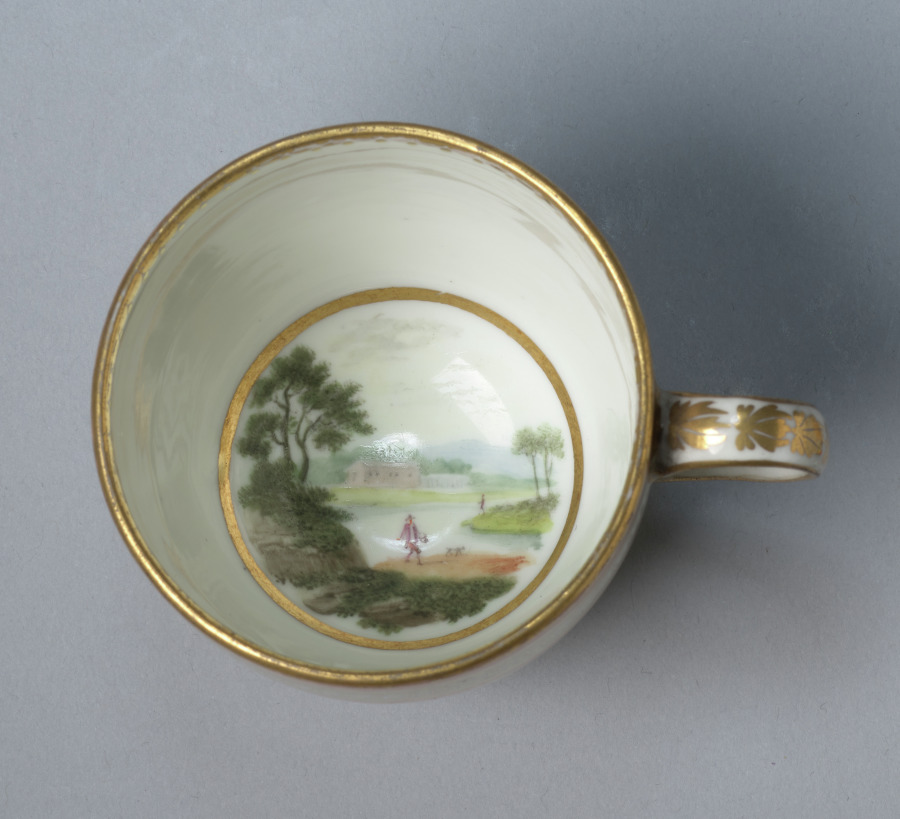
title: Cup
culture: England, Derby, early 19th century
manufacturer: Derby (Crown Derby Period) (British)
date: c. 1800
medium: porcelain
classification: Ceramic